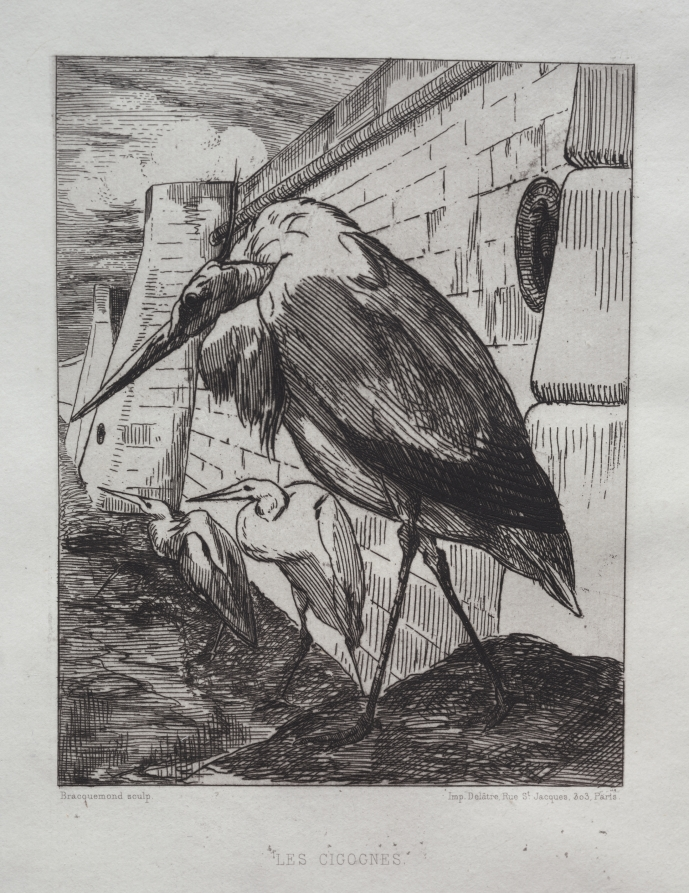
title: The Storks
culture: France, 19th century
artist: Félix Bracquemond (French, 1833–1914)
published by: Cadart & Luquet, Paris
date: 1865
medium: etching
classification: Print